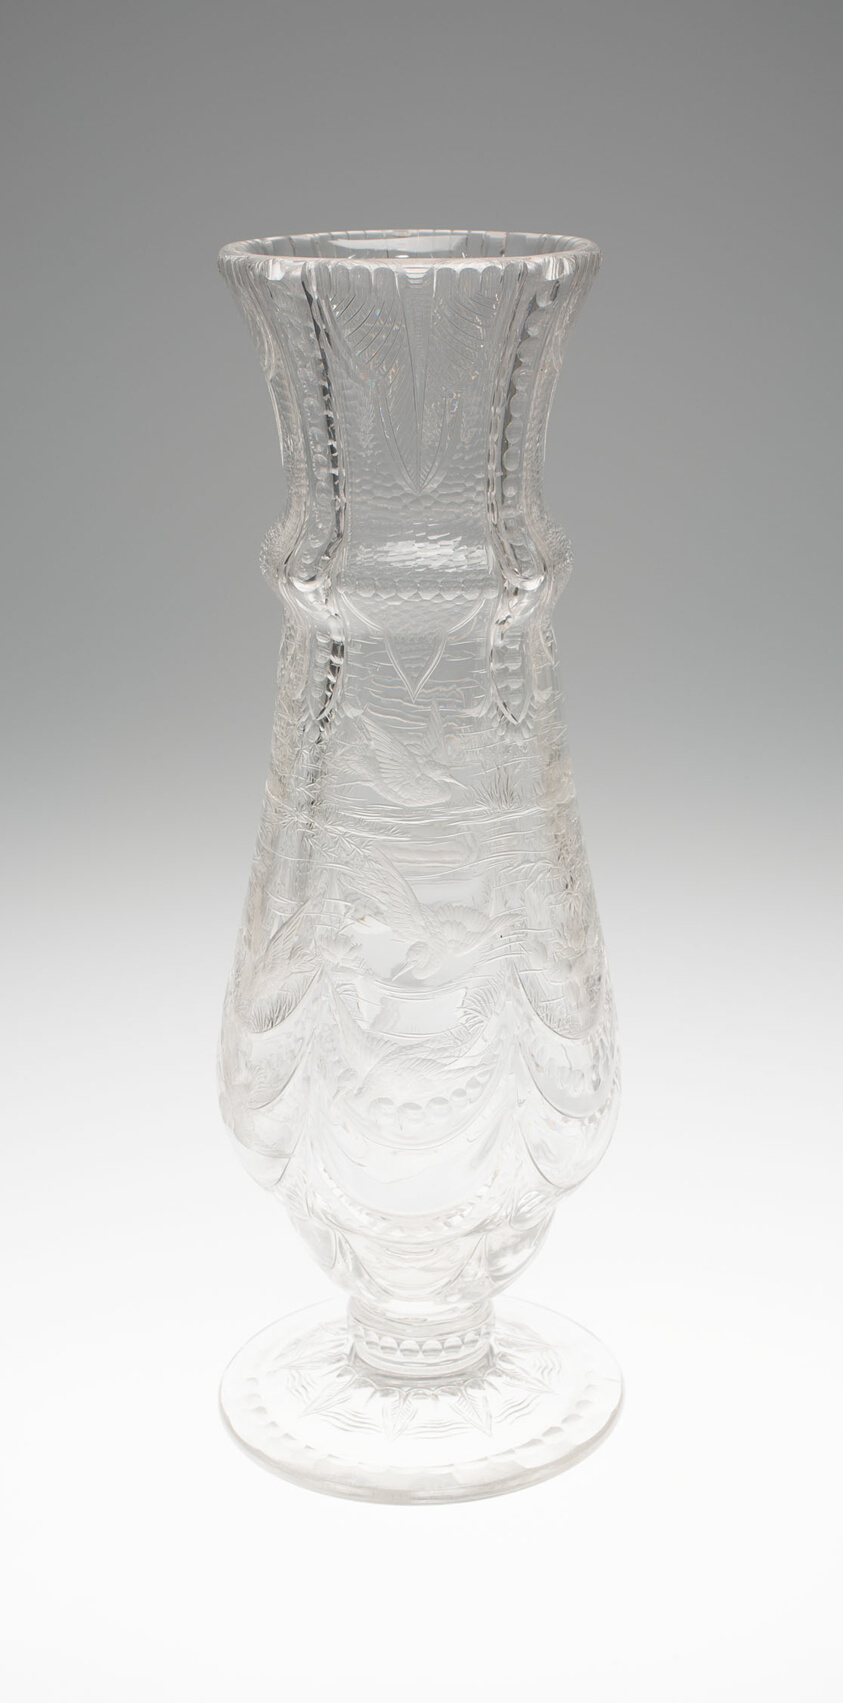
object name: Glass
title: Vase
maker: England, Stourbridge; Manufactured by Thomas Webb & Co. (English, founded 1837); Engraved by William Fritsche (English, fl. 19th century)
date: c. 1875/80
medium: Glass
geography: Stourbridge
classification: vase; vessel; engraved; glass; european decorative arts